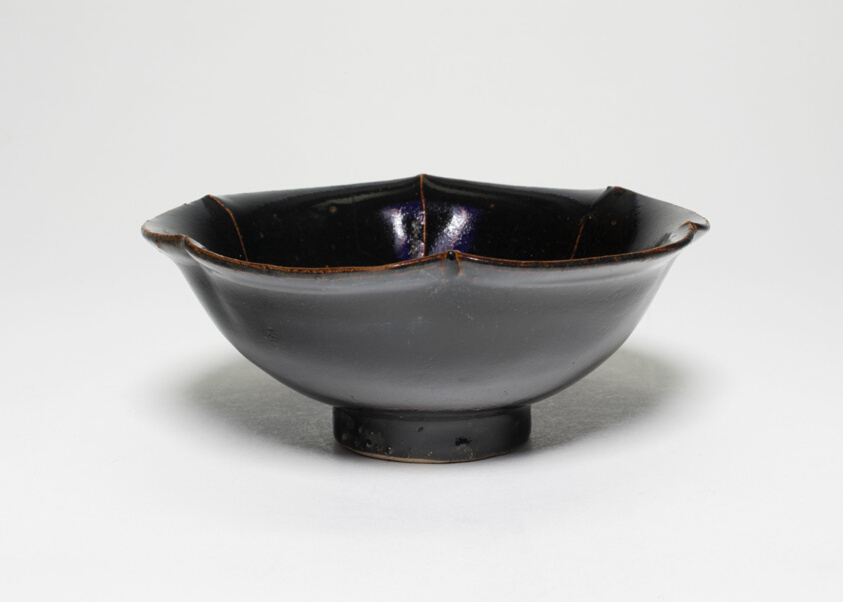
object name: Vessel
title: Bowl with Foliate Rim and White Ribs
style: Chinese (culture or style)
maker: China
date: Song dynasty (960–1279)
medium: Stoneware with black glaze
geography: China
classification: bowl; stoneware; dish (vessel); asian art; ceramics; vessel